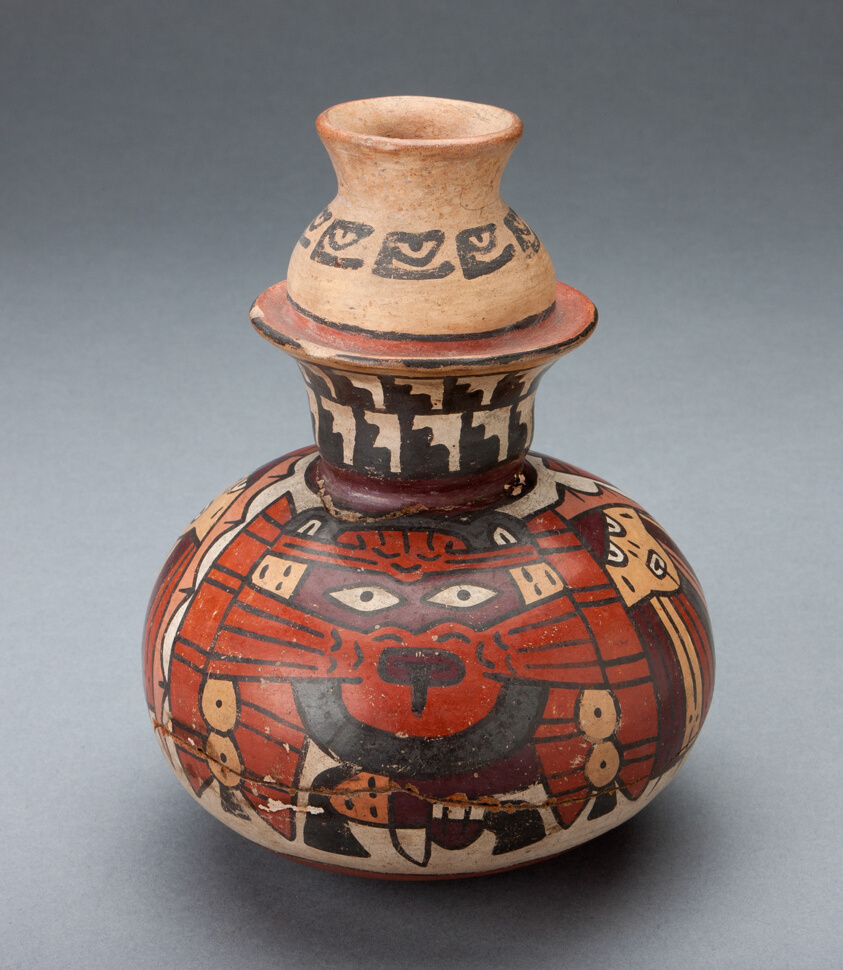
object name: Vessel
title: Jar with Intricate Spout Depicting a Ritual Performer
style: nazca, early intermediate period, Pre-Columbian, americas, Arts of the Americas, andean, andes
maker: Nazca; South coast, Peru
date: 180 BCE–500 CE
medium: Ceramic and pigment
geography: Nazca Valley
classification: earthenware; art of the americas; ceramics; vessel